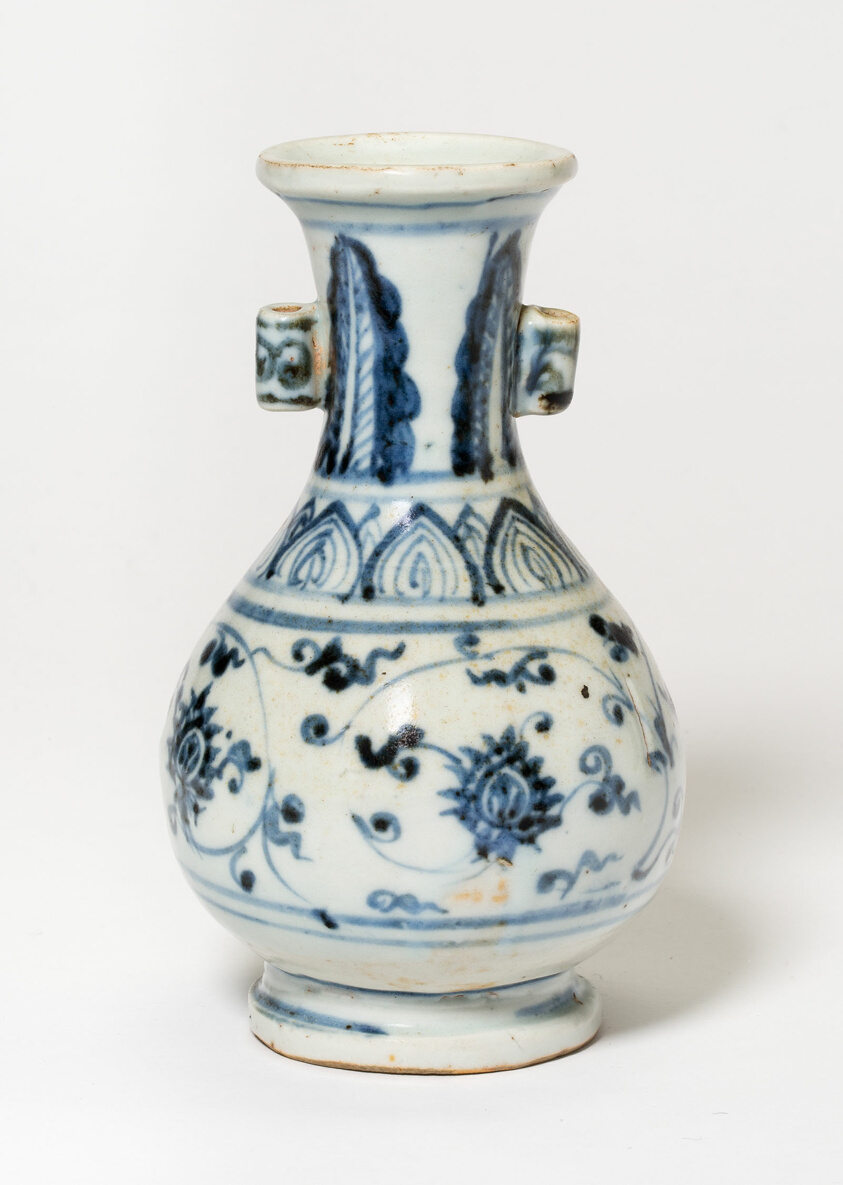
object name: Vessel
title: Vase with Loop Handles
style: Chinese (culture or style)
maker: China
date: Ming dynasty (1368–1644), 15th century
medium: Porcelain painted in underglaze blue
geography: China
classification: vase; vessel; porcelain; ceramics; asian art